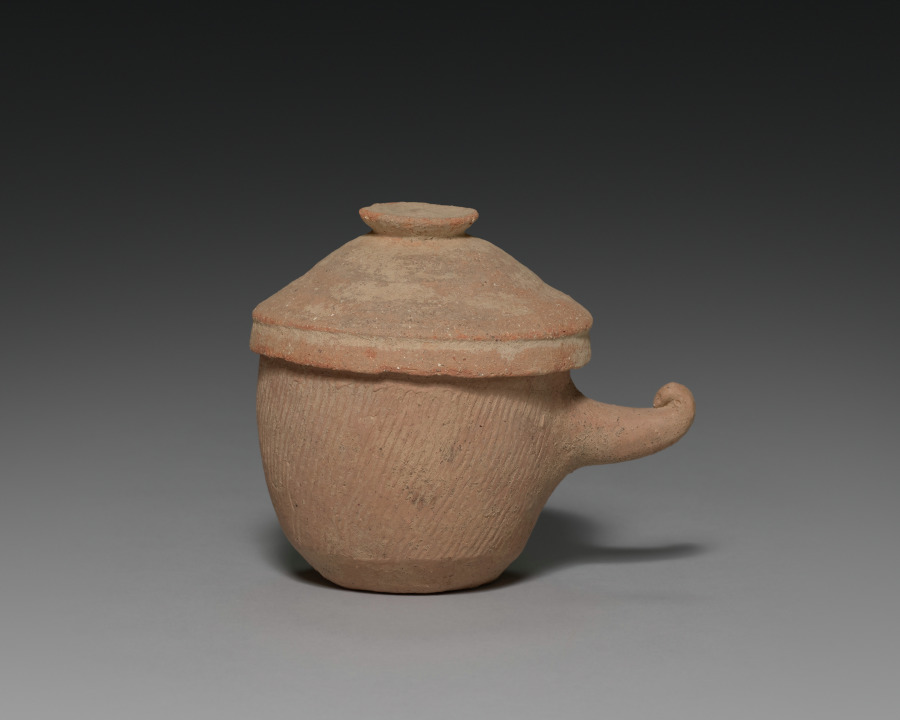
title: Lidded Jar with Horn Handle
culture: Korea, Silla (57 BC-935) or Kaya (AD 42-562) period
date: 400s-500s CE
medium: red earthenware with impressed designs and applied red slip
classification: Ceramic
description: This type of pottery vessel was a product of closed kilns built on hillsides, which became widely used in Korea during the Three Kingdoms period. Its low-fired red surface indicates the various steps in its fabrication. First, coils of clay were layered on top of one another and pinched together to form the wall of the pot. Then wood mallets with carved surfaces pounded these walls simultaneously, inside and out, merging and thinning the clay bands. Thus the impressed designs visible on both the inner and outer surfaces were functional as well as decorative.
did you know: Closed kilns built on hillsides became widely used for producing this type of pottery vessel in Korea during the Three Kingdoms period.